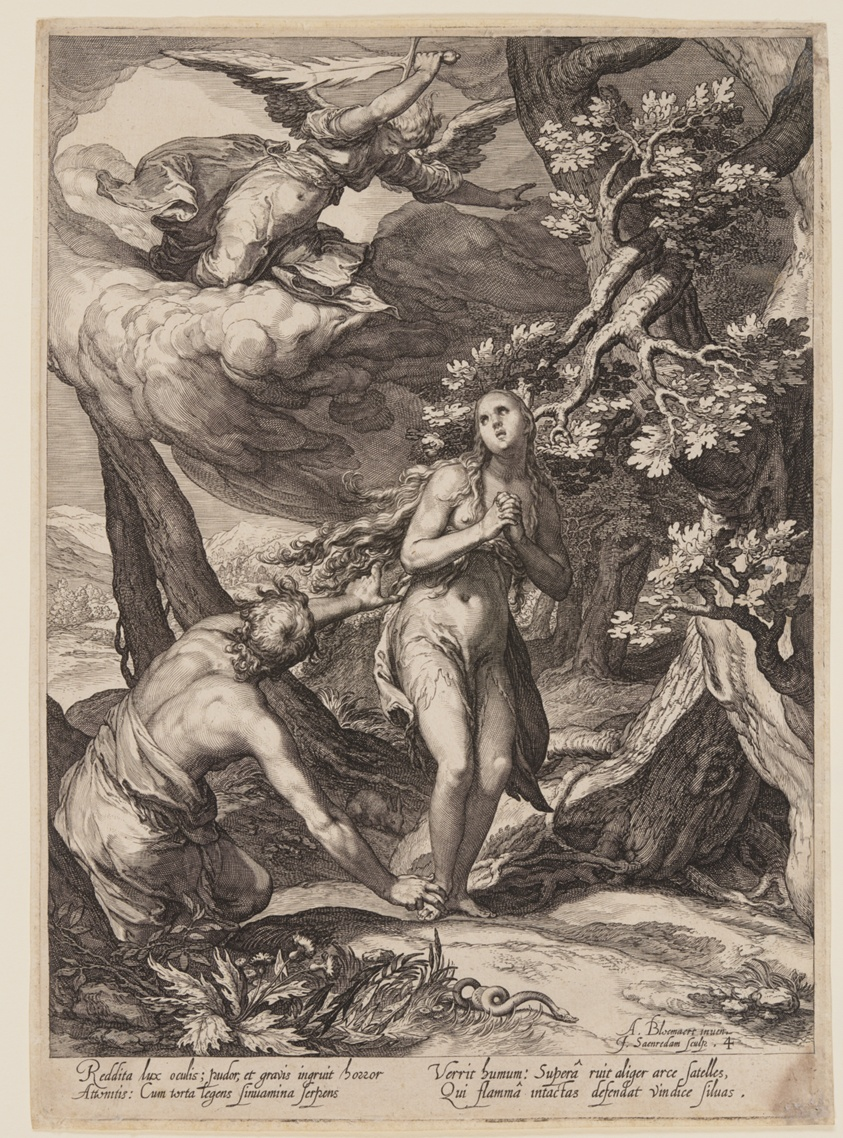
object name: Print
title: Expulsion from Eden, from History of the First Parents of Man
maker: Jan Saenredam (Dutch, 1565–1607); after Abraham Bloemaert (Dutch, 1566–1651)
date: 1604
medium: Engraving on ivory laid paper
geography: Netherlands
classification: engraving; paper; print; prints and drawing